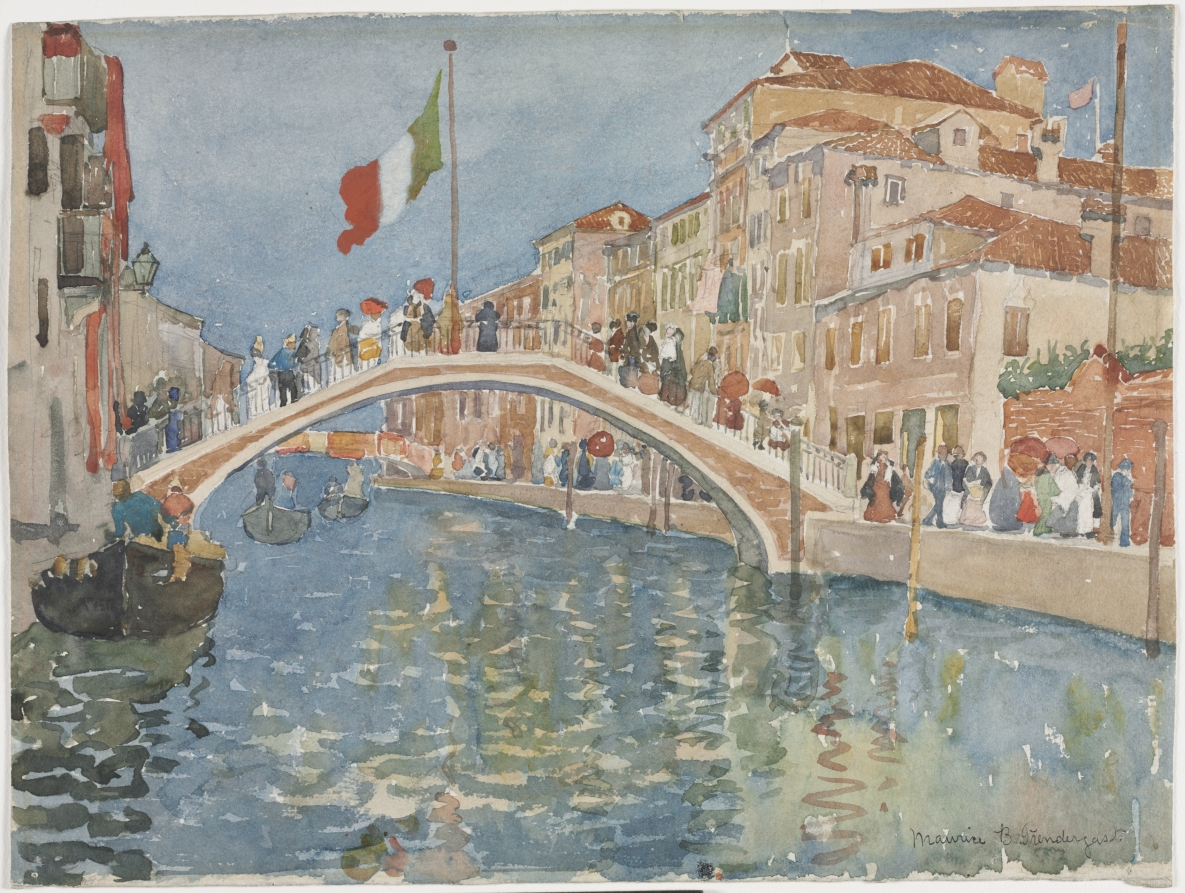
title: A Bridge in Venice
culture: America, late 19th Century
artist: Maurice Prendergast (American, born Newfoundland [now Canada], 1858–1924)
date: 1899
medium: watercolor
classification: Drawing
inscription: Signed lower right corner: Maurice B. Prendergast